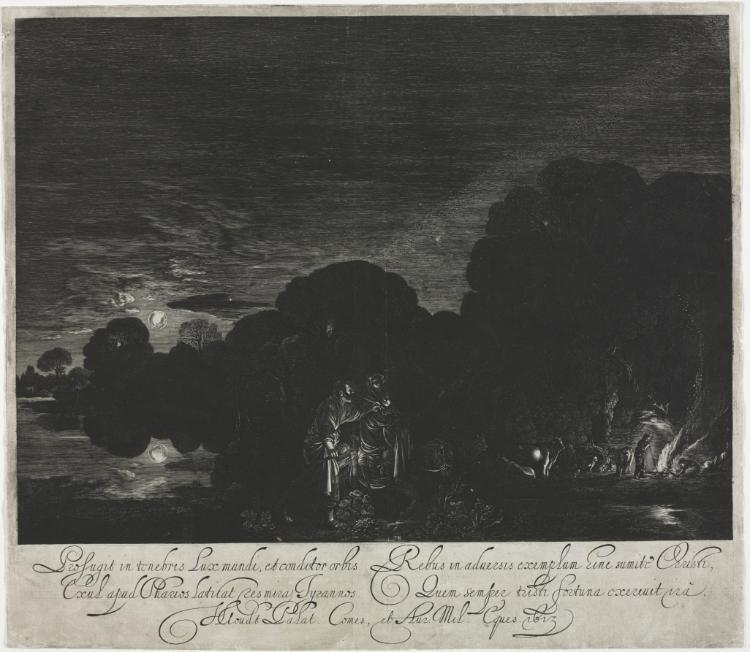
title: The Flight into Egypt (Night)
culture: Netherlands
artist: Hendrik Goudt (Dutch, 1583–1648)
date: 1613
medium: etching and engraving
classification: Print